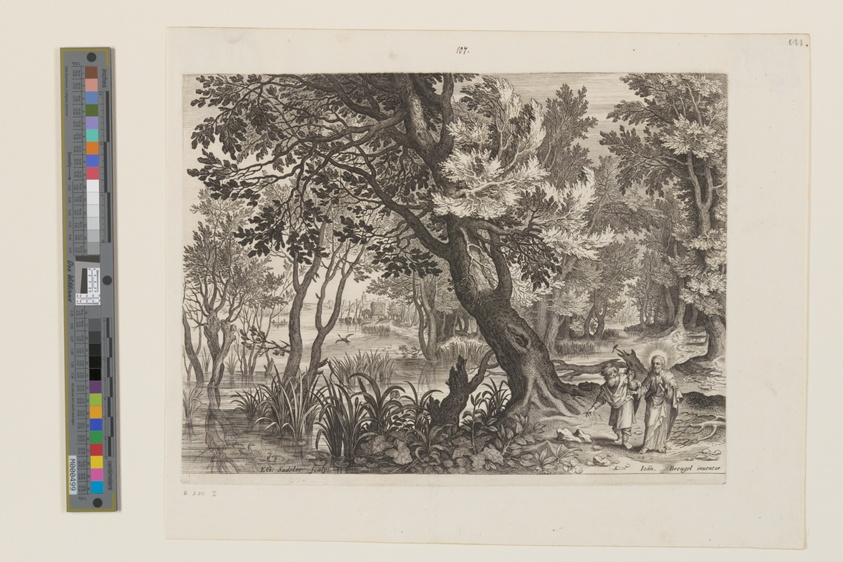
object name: Print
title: Riverscape with The Temptation of Christ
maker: Aegidius Sadeler II (Flemish, c. 1570–1629); after Jan Brueghel the Elder (Flemish, 1568–1625)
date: c. 1590-1620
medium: Engraving on ivory laid paper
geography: Flanders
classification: print; paper; prints and drawing; engraving